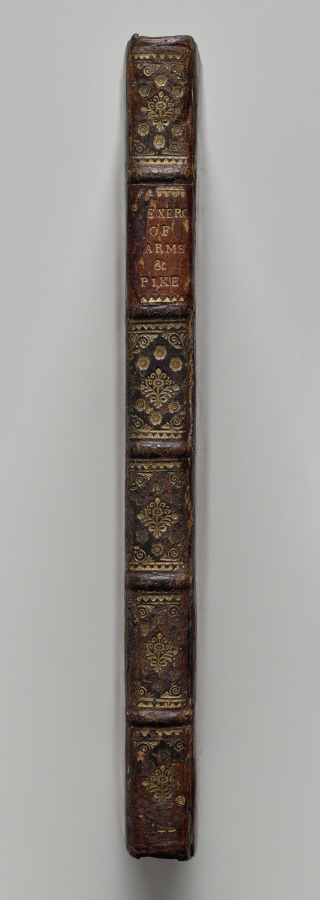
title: The Exercise of Armes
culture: Netherlands, The Hague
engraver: Jacob de Gheyn II (Netherlandish, 1565–1629)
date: 1607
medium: leather bound paper, 117 engraved plates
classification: Bound Volume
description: The Exercise of Armes, published in 1607–8, is one of the most famous manuals of arms. Jacob De Gheyn's book became popular all over Europe and was quickly translated into several languages. Its 117 copper engravings portray the step-by-step sequence for training foot soldiers in the handling of standard weaponry of 17th-century warfare: muskets, matchlock or calivers, and pikes.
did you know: The depiction of the soldiers in this book inspired Rembrandt when painting his famous The Night Watch.